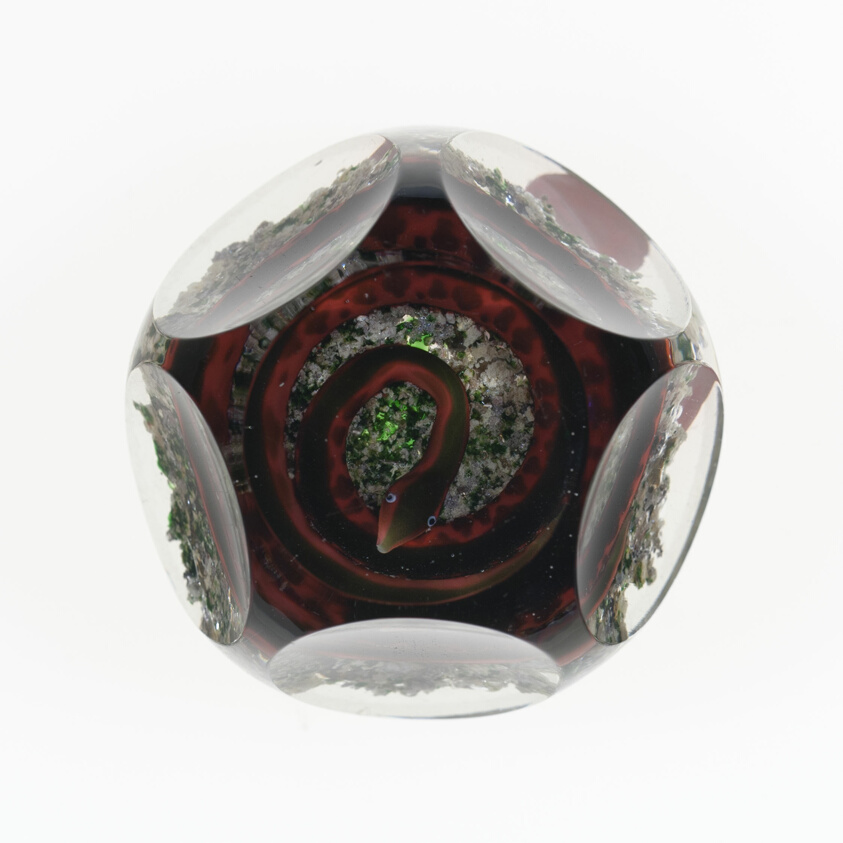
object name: Glass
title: Paperweight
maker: Baccarat Glassworks (Cristalleries de Baccarat); Lorraine, France, founded 1764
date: c. 1845–60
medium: Glass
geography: Baccarat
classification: paperweight; glass